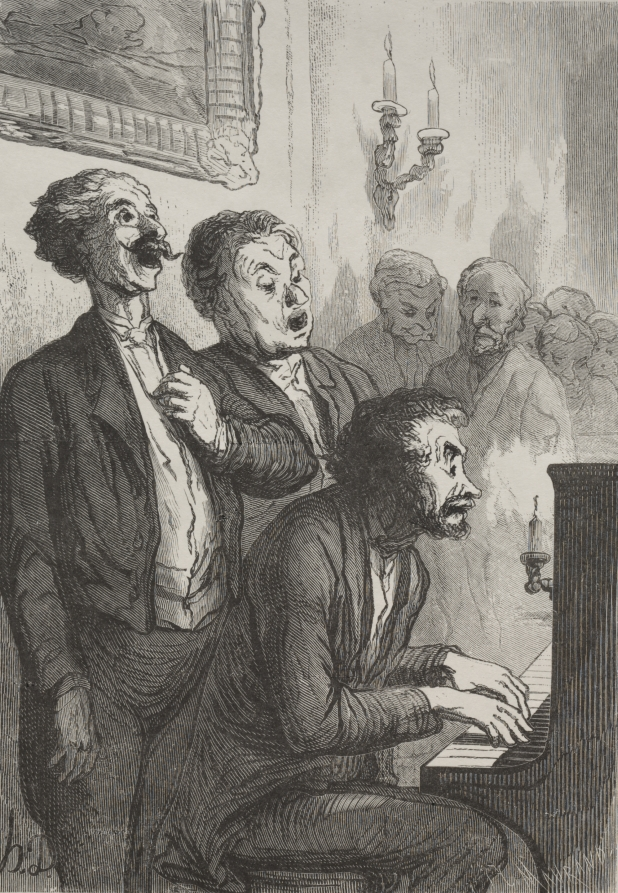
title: The Singers in the Salon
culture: France, 19th century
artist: Honoré Daumier (French, 1808–1879)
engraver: Charles Maurand (French, 1824–1904)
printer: François Louis Schmied (Swiss, 1873–1941)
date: 1862, printed 1920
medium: wood engraving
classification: Print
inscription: Lower margin, pencil 42/75 ; red stamp: FLS